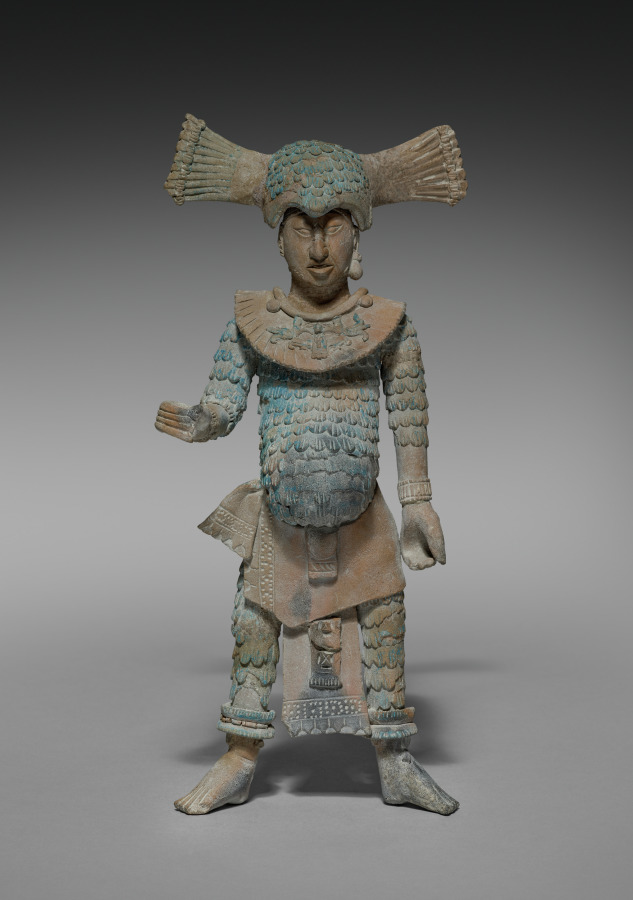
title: Warrior Figurine with Removable Headdress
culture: Mexico, Yucatán, Jaina Island region, Campeche, Maya style (250-900)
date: 600–900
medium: earthenware with pigment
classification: Sculpture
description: The major offerings placed in the Maya graves of Jaina Island were ceramic figurines, some of Mesoamerica's finest, that depict deities and humans in a variety of roles. This warrior, his headdress removable, once probably held weapons and wears either quilted cotton armor or the feathered uniform of a military order. We don't know why such figures are often pot-bellied.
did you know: Maya blue pigment was made by combining clay with indigo in a complex technique developed around the ninth century.